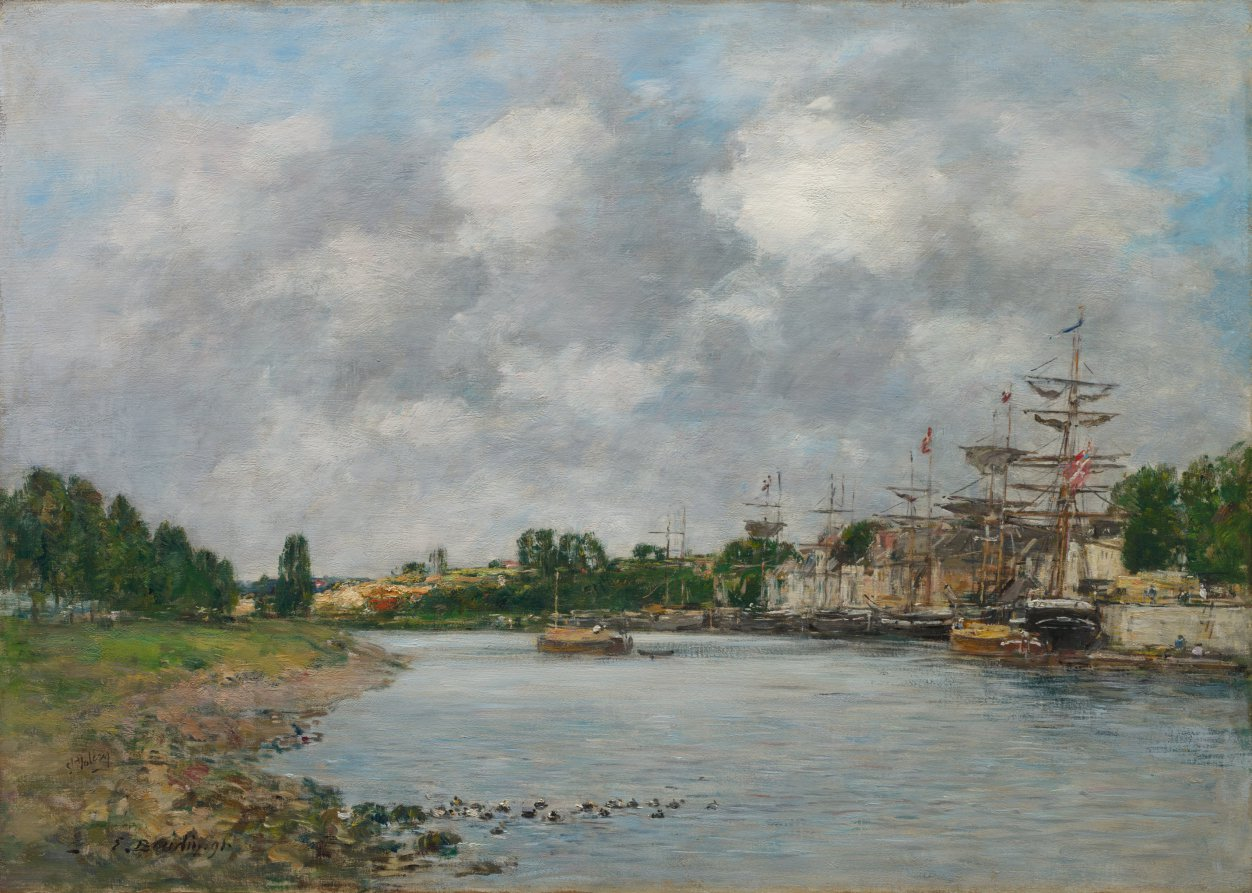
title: View of the Port of Saint-Valéry-sur-Somme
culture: France, 19th century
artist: Eugène Boudin (French, 1824–1898)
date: 1891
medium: oil on canvas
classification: Painting